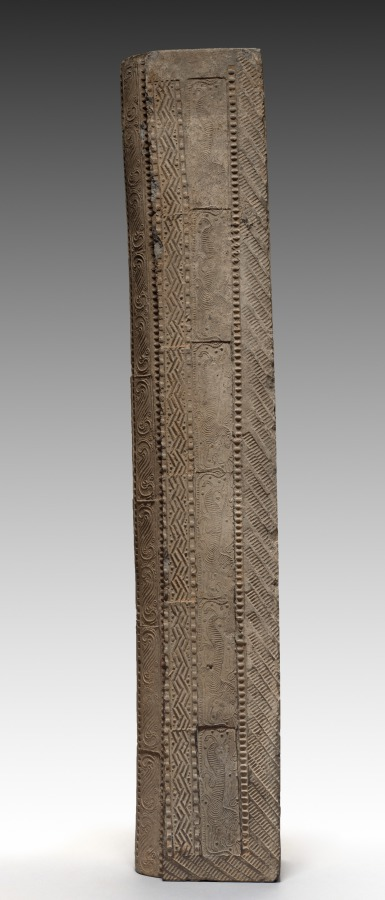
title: Hollow Tile: Lintel from Tomb-Chamber Doorway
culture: China, Han dynasty (202 BCE–220 CE)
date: 100–200 CE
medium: earthenware, die-stamped relief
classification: Ceramic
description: Striding tigers (top), racing horsemen (right column), and reverent officials (left column) are stamped into the surface of this underground portal to a tomb. The doorway preserves in stone the post-and-lintel structure, a basic element of Chinese wooden architecture. By the first century CE, a revolution in Chinese tomb construction and furnishing had taken place. Tombs lined with decorated bricks and tiles replace the earlier tombs constructed with only rammed-earth walls. Ceramic surrogates or models of stoves, houses, servants, and pets filled these more durable chambers, symbolically extending the creature comforts of this world into the world after death.